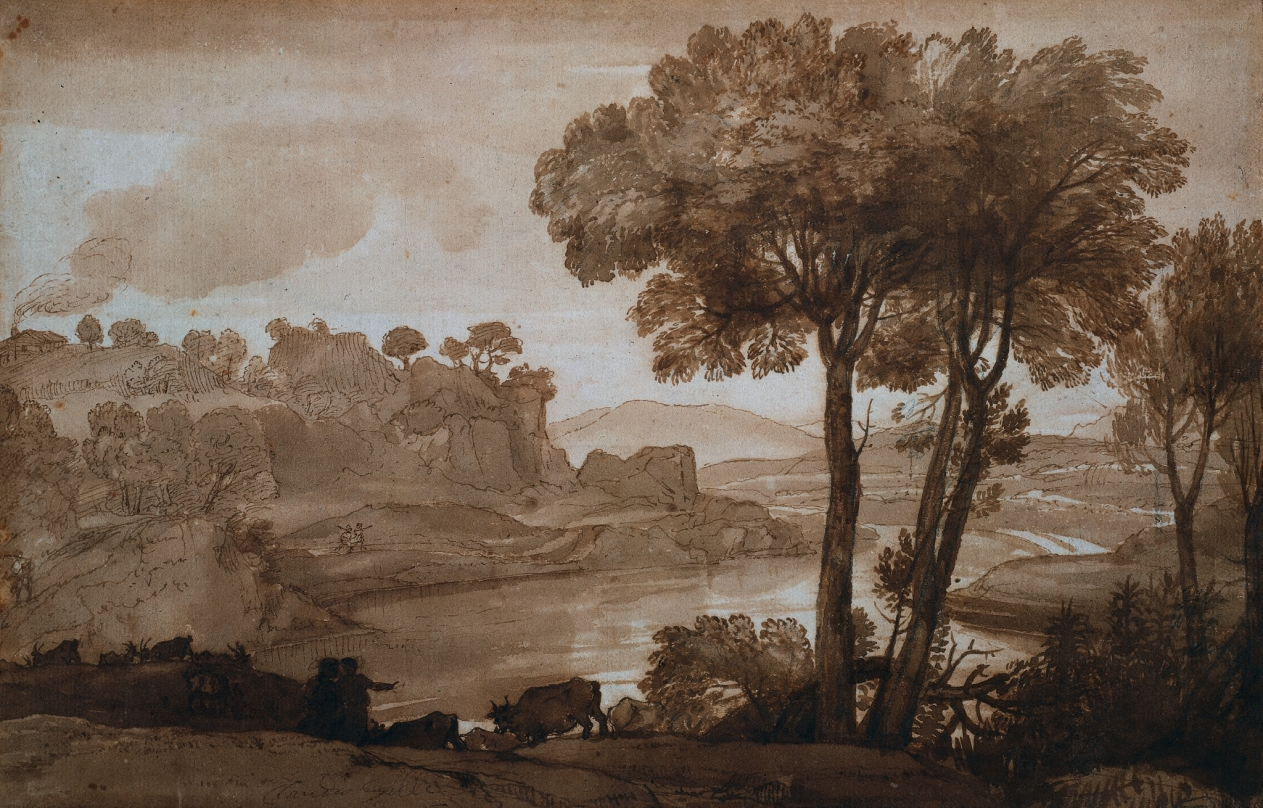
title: View of the Acqua Acetosa (recto)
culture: France, 17th century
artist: Claude Lorrain (French, 1604–1682)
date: c. 1645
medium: pen and brown ink and brush and brown wash over graphite, framing lines in brown ink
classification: Drawing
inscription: verso, lower left, in brown ink: beau peisage de claude Le Lorrain; lower left, in graphite: David; lower right, in graphite: Golia; upper center, in graphite: No 2599; lower center, in graphite: Claude Lorraine / From the Collection of / Lord Brownlow (The Belton / House Collection) / Signed Claudio Gellée.; lower left, in red watercolor: 55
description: This drawing represents a view of the famous Acqua Acetosa, a mineral spring that until the 19th century provided the favored drinking water of Romans who believed in its healing powers. Although topographically accurate, the sheet is not a plein-air study but a vision of an imagined Arcadian world carefully rendered by Gellée, one of the most original painters of the 17th century. The French-born artist spent his career painting and drawing the Roman Campagna and the Neopolitan coastline. Sublimely beautiful pen-and-ink and wash drawings such as the example here reveal the artist's highly poetic response to the natural world and his unparalleled sensitivity to light.